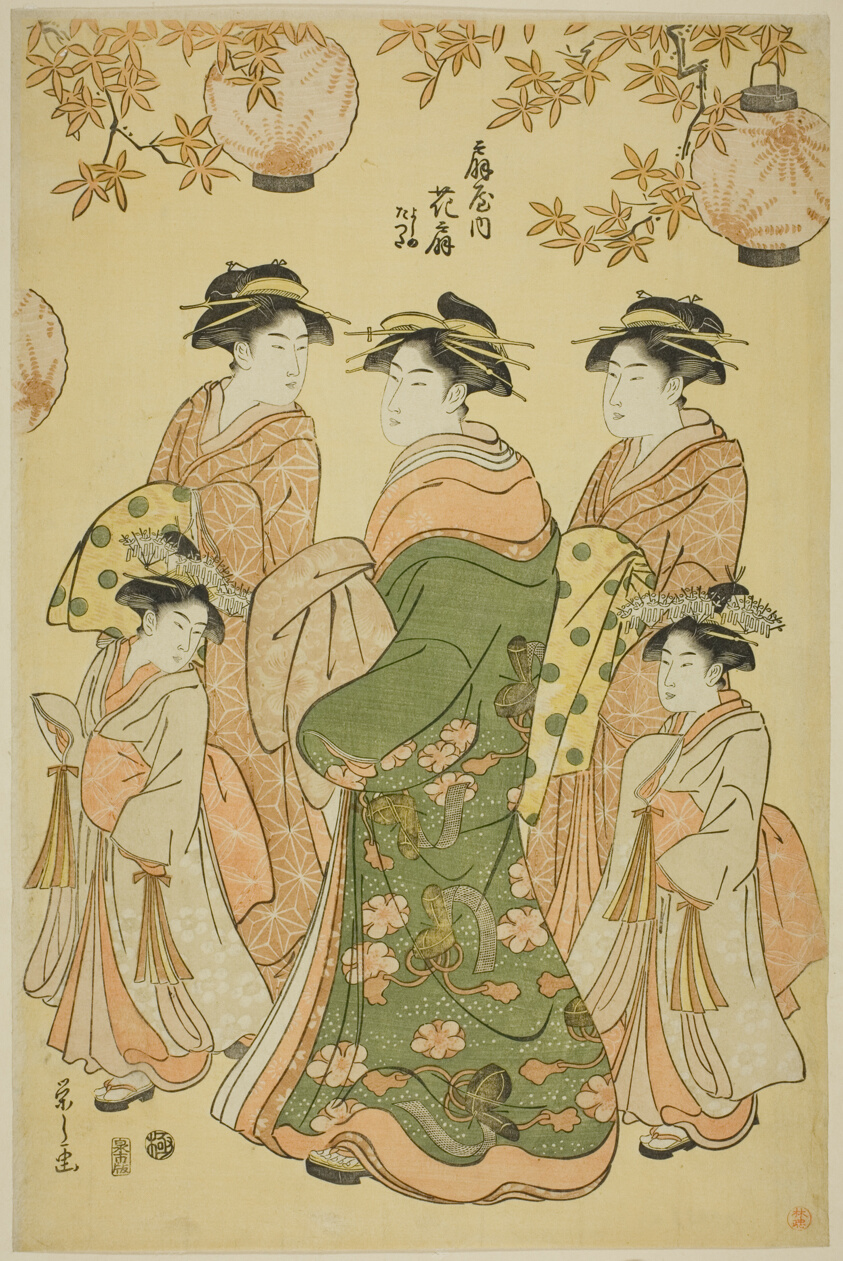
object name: Print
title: The Courtesan Hanaogi of the Ogiya, with Child Attendants Yoshino and Tatsuta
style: Japanese (culture or style)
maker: Chobunsai Eishi; Japanese, 1756-1829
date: c. 1793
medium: Color woodblock print; right sheet of oban triptych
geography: Japan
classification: woodblock print; print; asian art